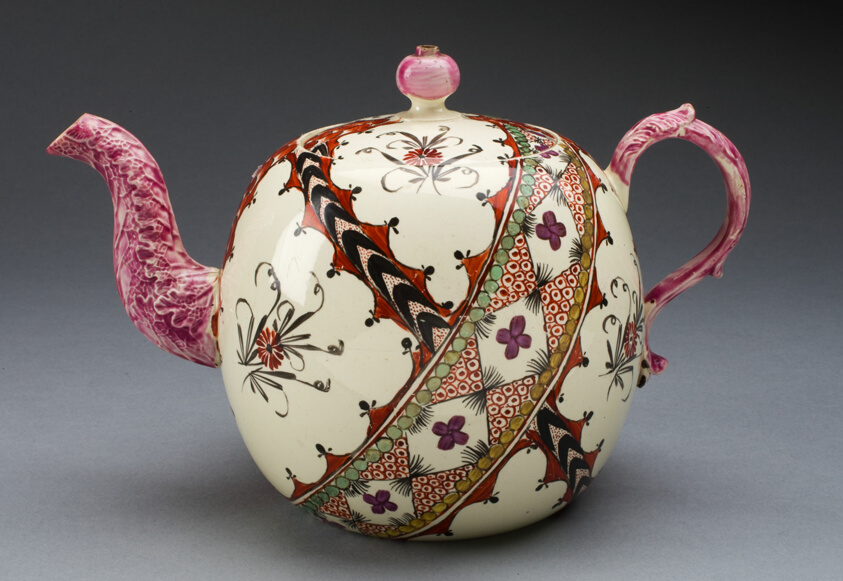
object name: Ceramics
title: Teapot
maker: Leeds, England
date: c. 1770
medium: Lead-glazed earthenware (creamware) and polychrome enamels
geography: Leeds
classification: teapot; earthenware; lead-glazed earthenware; creamware; ceramics; european decorative arts